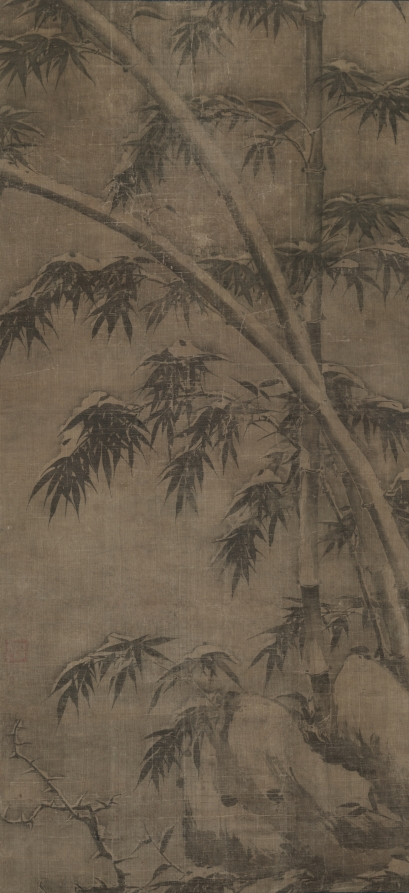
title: Bamboo in Four Seasons: Winter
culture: China, Yuan dynasty (1271-1368)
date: 1279–1368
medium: hanging scroll; ink on silk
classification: Painting